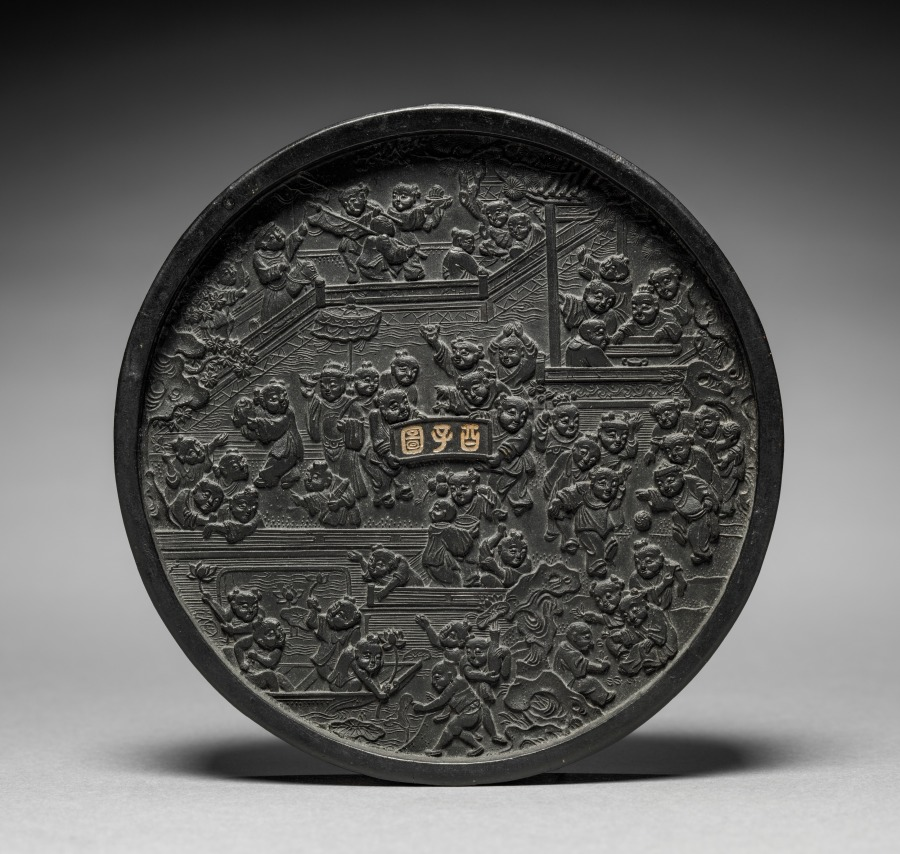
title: Ink Cake with One Hundred Children at Play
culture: China, Ming dynasty (1368–1644)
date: 1368–1644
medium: molded ink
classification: Miscellaneous